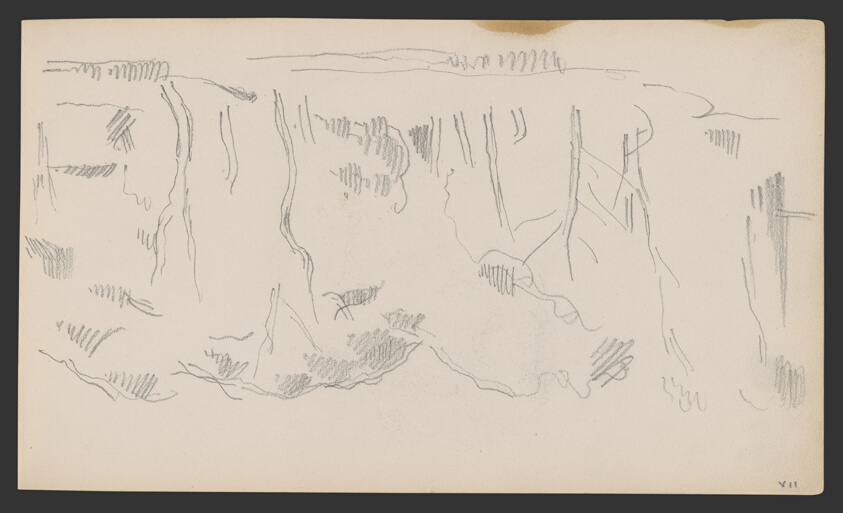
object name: Drawing and Watercolor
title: Sketchbook No. 2 (L'Estaque)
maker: Paul Cézanne; French, 1839-1906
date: 1875–86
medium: Graphite and pen and ink drawings on paper, bound into a book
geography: France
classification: sketchbook; graphite; prints and drawing; paper